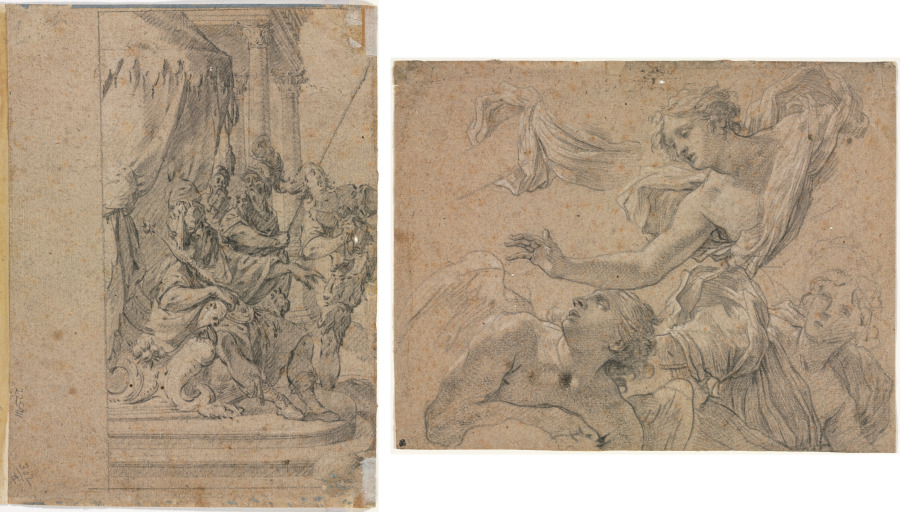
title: Studies of Angels (recto); Panthea before Cyrus? (verso)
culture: France, 17th century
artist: Michel Dorigny (French, 1617–1665)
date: 1655–60?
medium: black chalk heightened with white chalk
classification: Drawing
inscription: verso, lower left, in graphite: 225911 [sideways]; lower left, in graphite: 302 [underlined] / 1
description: Dorigny was the collaborator and son-in-law of Simon Vouet, the leading painter working in Paris in the mid-1600s. Their drawing styles are similar, and this sheet was once attributed to Vouet. However, the airy, floating drapery, firm contour lines, and regular parallel hatching lines are all typical of Dorigny's technique in black chalk. Although we do not know of a painting to which this drawing relates, the flying angels indicate that Dorigny had a religious subject in mind when he drew them.